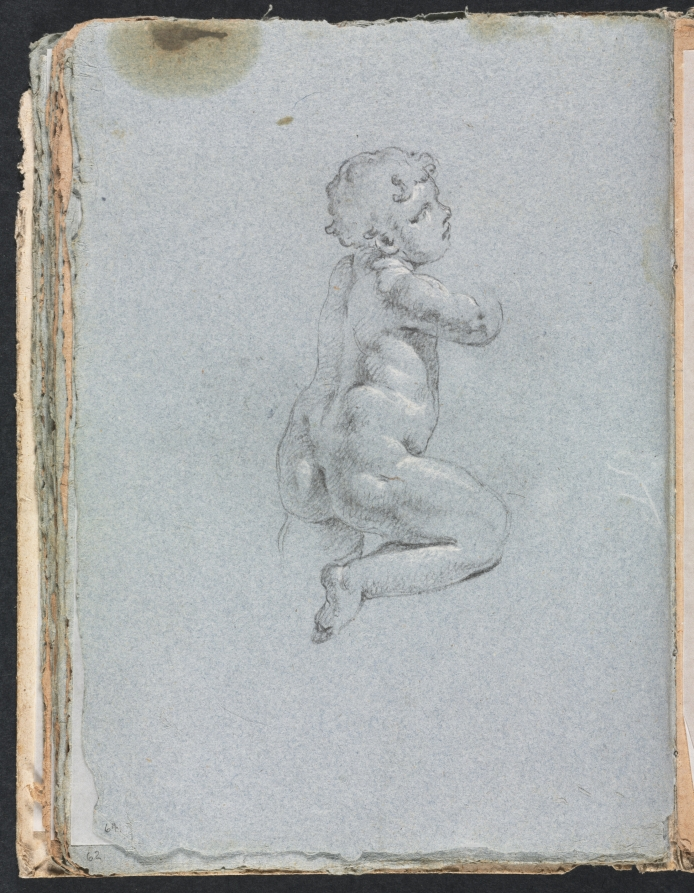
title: Verona Sketchbook: Putto in profile (page 64)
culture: Italy, 18th century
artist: Francesco Lorenzi (Italian, 1723–1787)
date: 1760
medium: black chalk with white heightening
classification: Bound Volume